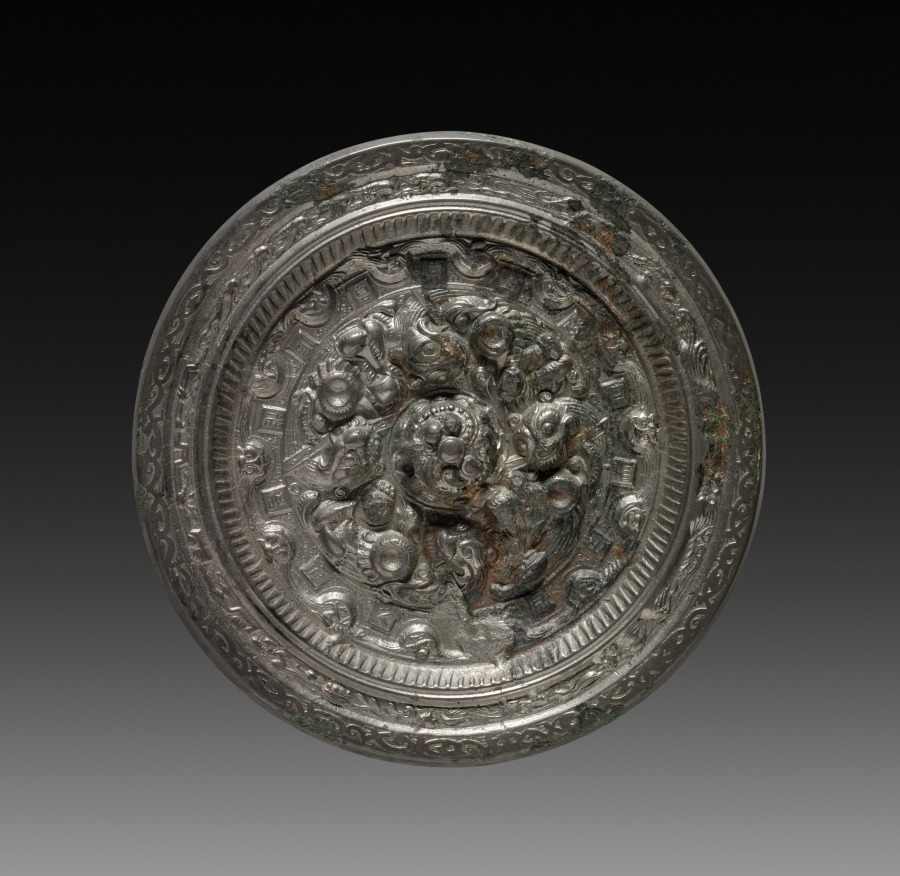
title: Mirror of the "Deities and Beasts"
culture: China, early Six Dynasties Period (317-581)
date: 300–400 CE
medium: bronze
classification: Metalwork